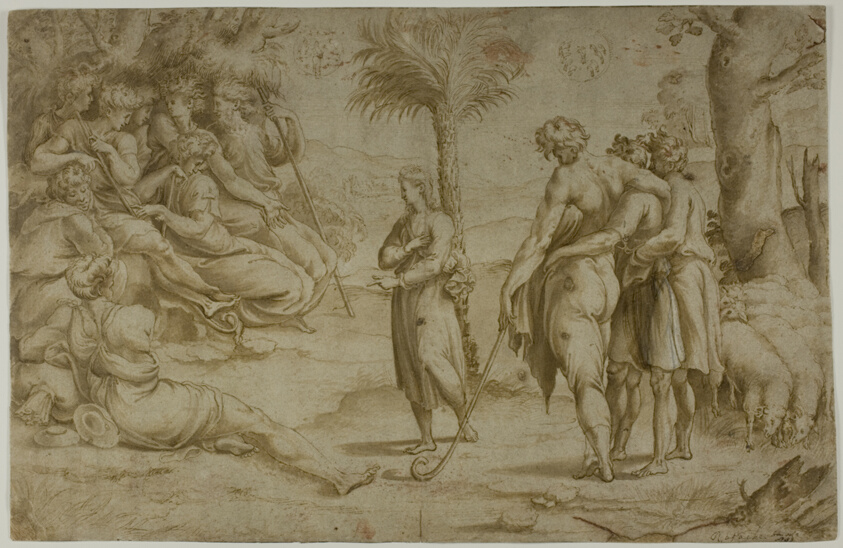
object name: Drawing and Watercolor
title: Joseph Explaining His Dreams to His Brothers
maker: Attributed to Nicholas Béatrizet (French, 1507/20-c. 1565); after Raffaello Sanzio, called Raphael (Italian, 1483-1520)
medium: Pen and brown ink and brush and brown wash, heightened with lead white, with incising, on ivory laid paper, laid down on cream laid card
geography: Italy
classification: ink and wash; drawings (visual works); prints and drawing